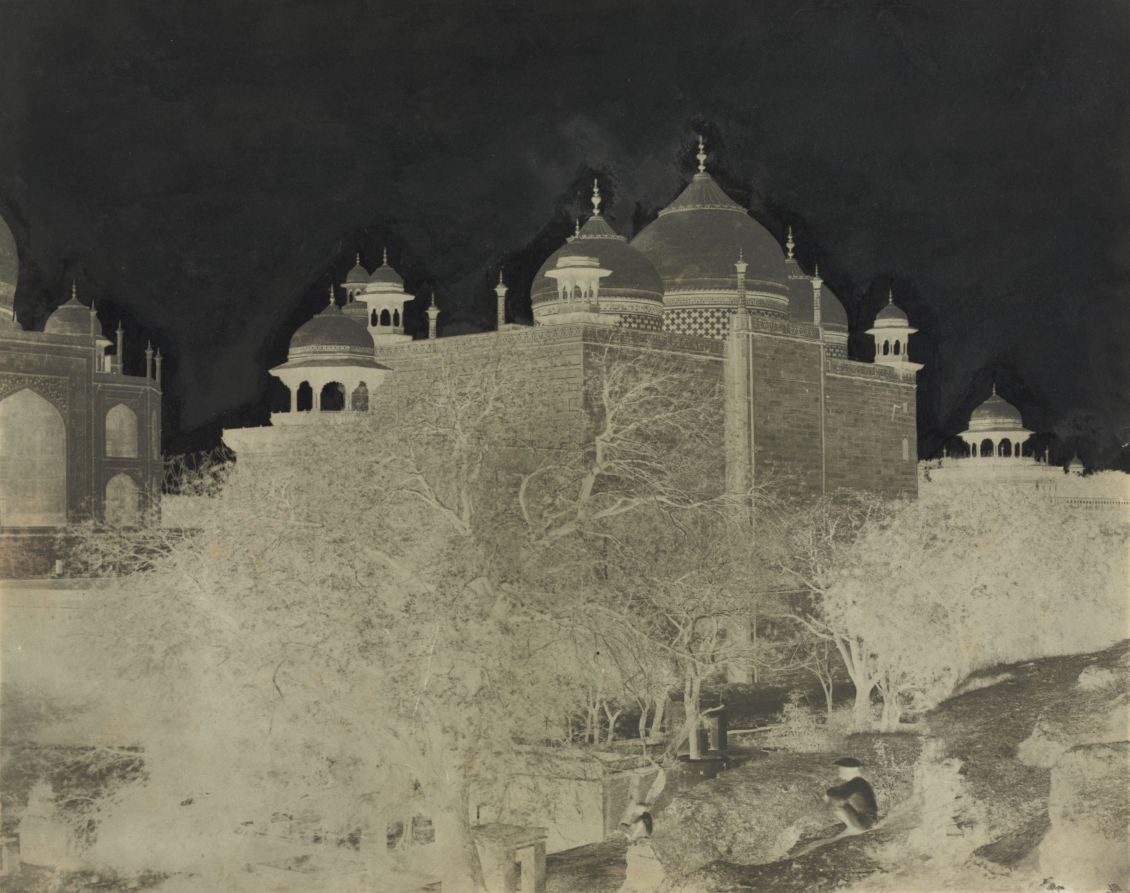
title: Taj Mahal, Back View of the Rest-House, with Figure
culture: England, 19th century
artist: Dr. John Murray (Scottish, 1809–1898)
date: c. 1858–1862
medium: waxed paper negative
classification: Photograph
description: Although Dr. John Murray enjoyed a distinguished medical career as a surgeon, administrator, and leader in the fight against cholera, he is now best known for his superb paper negative photographs of India. Having lived near the Taj Mahal in the city of Agra for 20 years, Dr. Murray took great interest in the monument, photographing it from numerous perspectives and under varying light conditions. In this print, he chose an elevated viewpoint to compose an intriguing rendering of the Rest-House. The paper negative was waxed before sensitizing, improving its translucency and allowing the photographer to render his architectural subject matter in broad areas of light and dark, emphasizing the building's bold geometric forms. The surrounding, picturesque landscape adds both visual interest and complexity to the composition. Seated figures in the foreground provide an indication of scale and the sense of wonder that might be experienced in the presence of this vast monument.